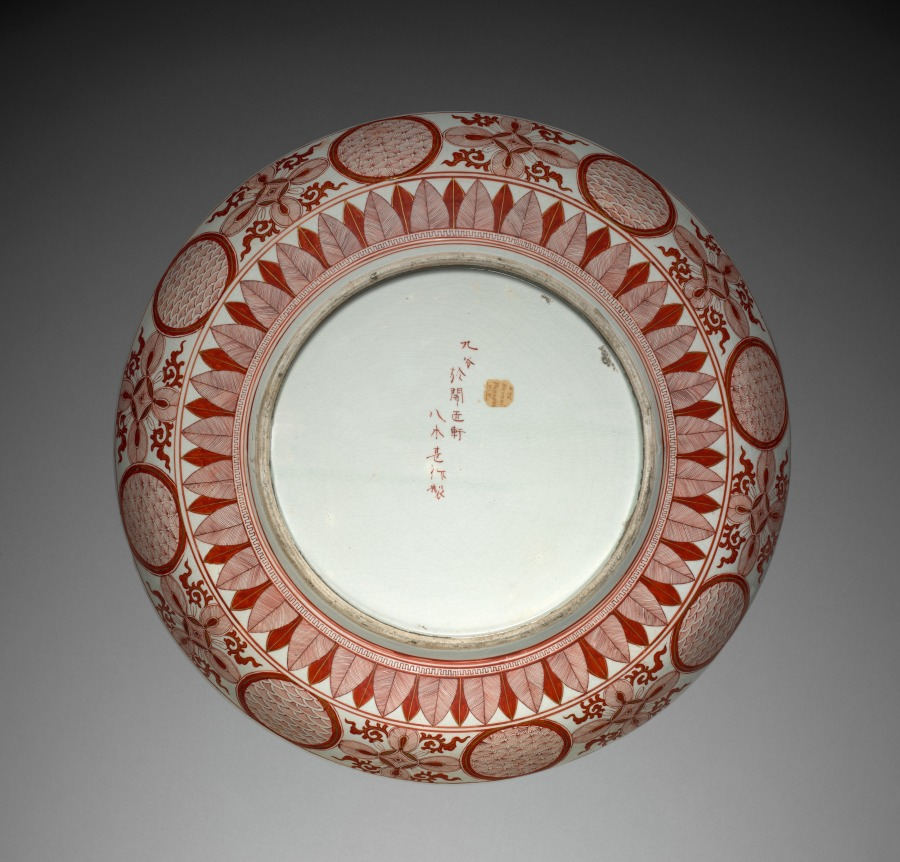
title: Bowl: Kutani Ware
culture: Japan, Edo period (1615–1868)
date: early to mid-1800s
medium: porcelain with overglaze enamel and gold decoration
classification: Ceramic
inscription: on bottom: "Kutani Dashoken ni-oi-te Yagi Jinsaku Sei-su" [Yagi Jinsaku made this bowl at Dashoken factory in Kutani].